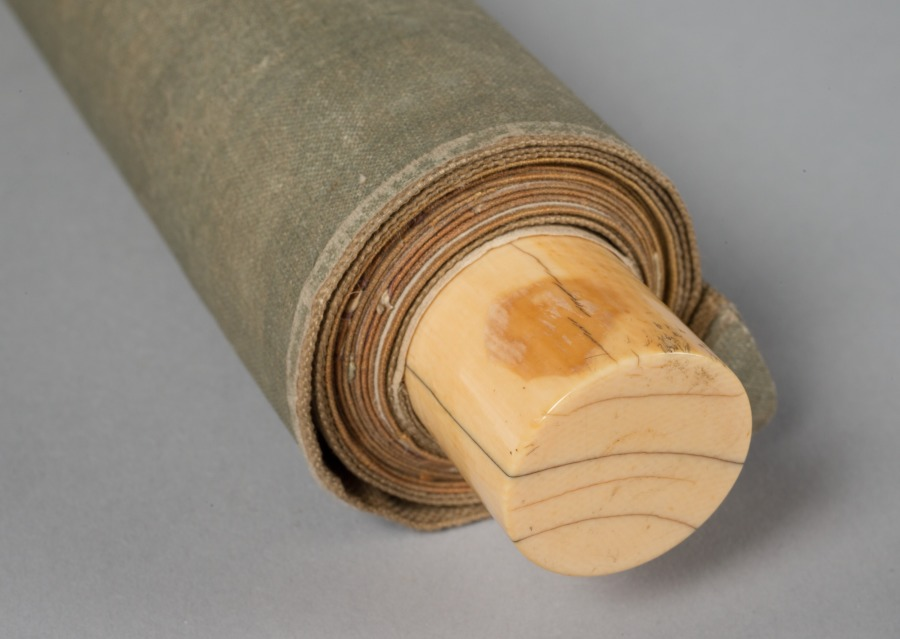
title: Owl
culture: Japan, Edo period (1615–1868)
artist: Tsuda Bensaku (Japanese, active 1620s–40s)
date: 1630s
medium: hanging scroll; ink and slight color on paper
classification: Painting